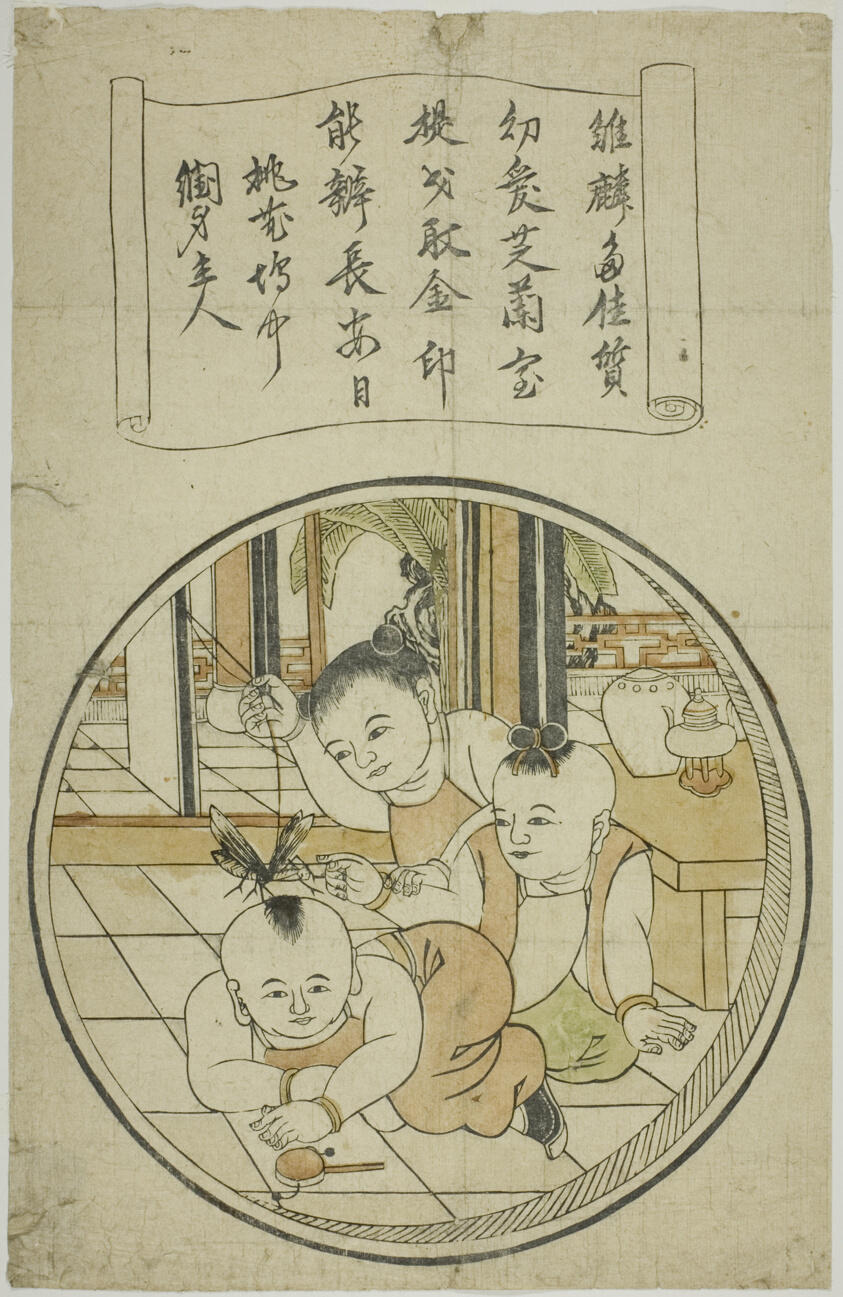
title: Three Chinese Children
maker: Japanese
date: 1790–1810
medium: Color woodblock print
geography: Japan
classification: woodblock print; print; asian art